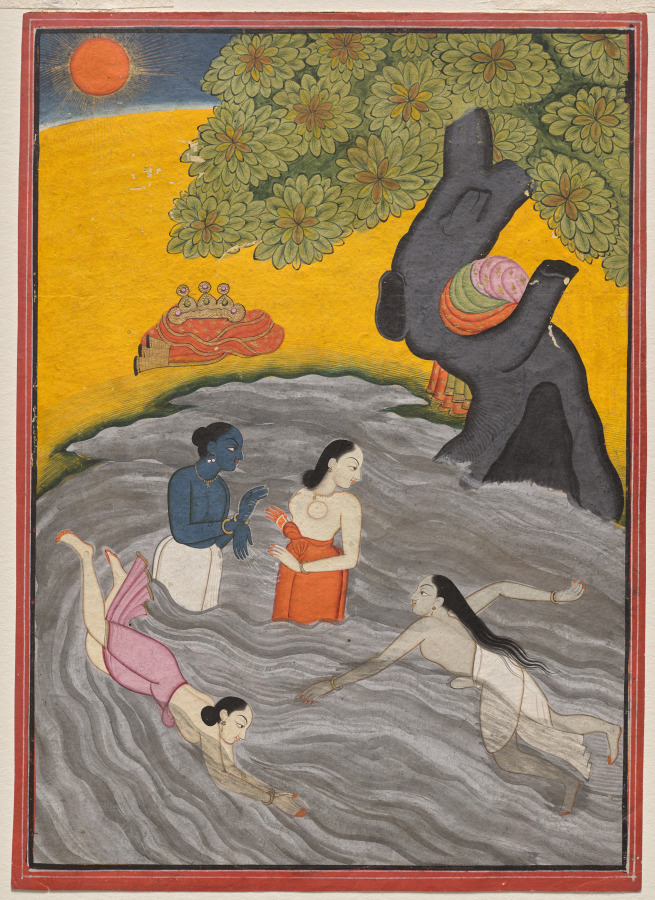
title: Krishna Playing with the Gopis in the Yamuna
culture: Northern India, Pahari kingdoms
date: c. 1770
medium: gum tempera and gold on paper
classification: Painting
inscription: 13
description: After Krishna raised Mount Govardhan, he began to play erotically with the girls of his village. Under a scorching sun, Krishna and three milkmaids enjoy the cooling waters of the Yamuna River. The women neatly stack their clothes on a nearby tree, and Krishna’s crown and scarf rest by the bank. Krishna playfully splashes one of the women, and she turns her face away. This scene evokes the joy of spending life in intimacy with the god Krishna.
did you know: Krishna playfully splashes one of the women who turns her face away.